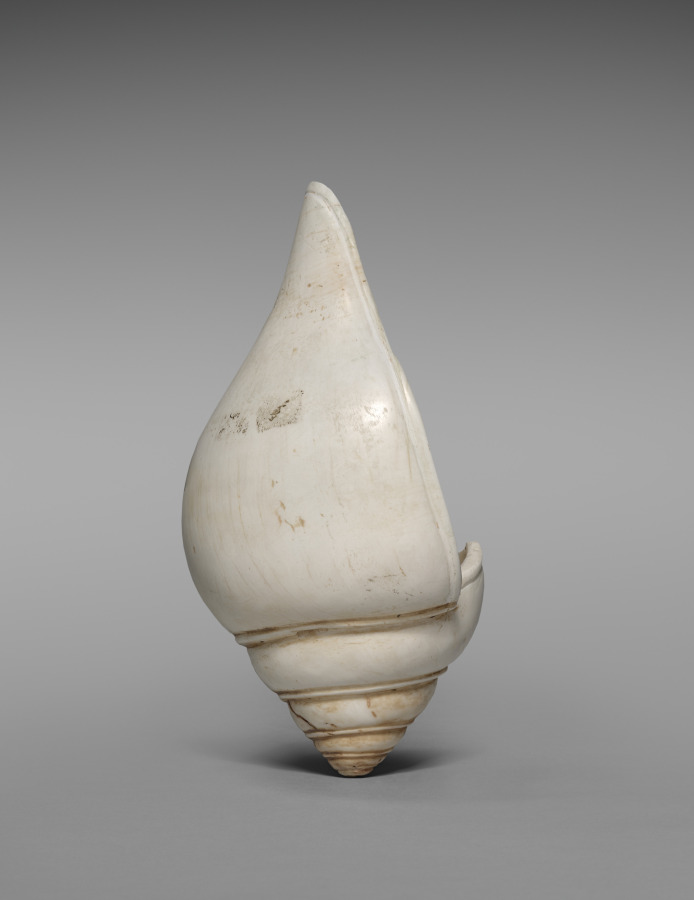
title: Ritual conch shell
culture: Cambodia, Khmer, Angkor Period, 12th-13th Century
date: 1100s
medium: shell and bronze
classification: Sculpture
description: A royal temple like Banteay Chhmar was built for performing rituals and to honor images of gods, Buddhas, and other sacred or enlightened beings for the sake of the kingdom’s protection and ongoing prosperity. Conch shells were blown at the start of rituals to make the sound corresponding to the syllable om. The dancing figure of Hevajra, a Buddhist being of enlightenment with eight heads, sixteen arms, and four legs, has been worked into the bronze embellishment of the shell. Hevajra was elevated to a prominent position in Khmer Buddhism of the Angkorian period as the standard figure denoting the practice of rituals prescribed in a text called the Hevajra-tantra. The tripod stand with three serpents is probably not original to the shell.